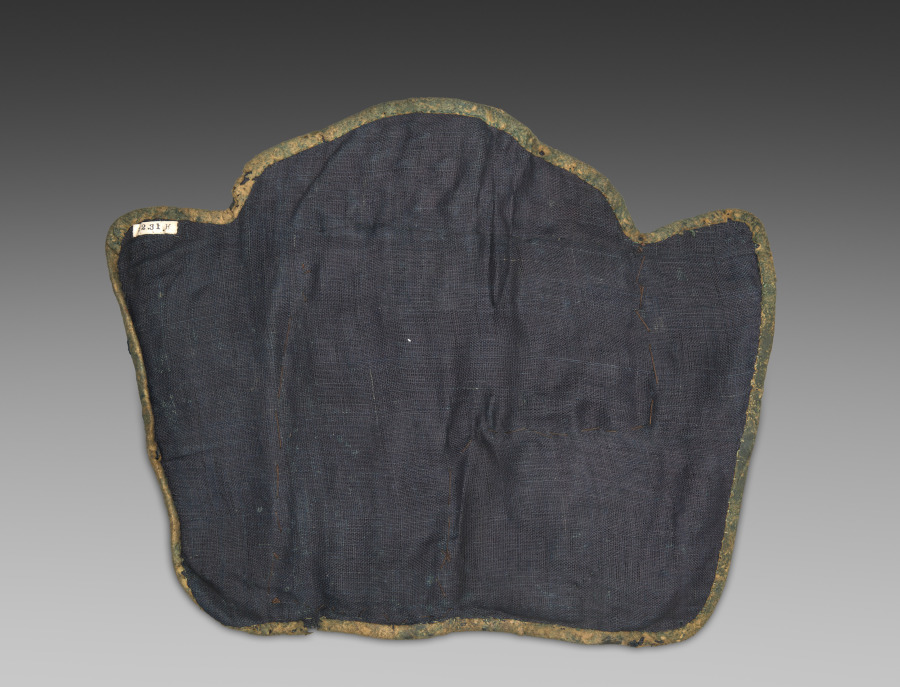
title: Shin Guard (Sune-ate)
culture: Japan, Edo period (1615–1868)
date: 1615–1868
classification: Arms and Armor